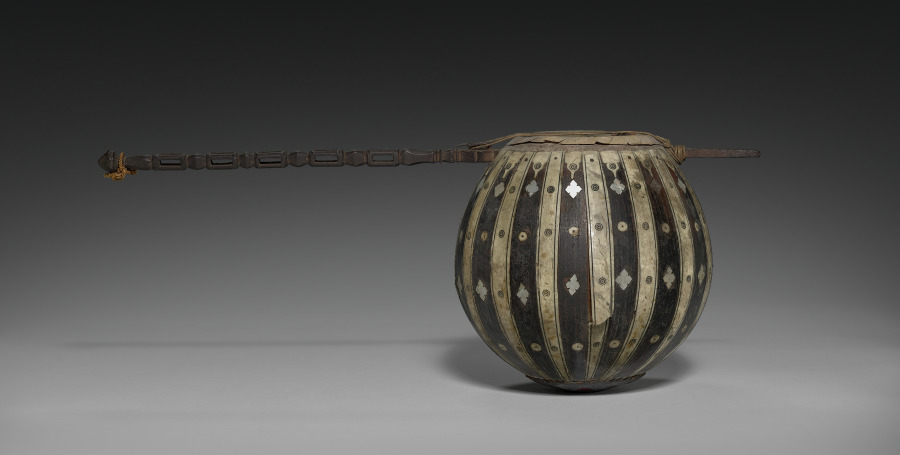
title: Kamānche (incomplete)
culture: Northern Iran (Caucasian, maybe Azerbaijan, or Kashmir)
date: 1875–1900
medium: Wood, hide, and bone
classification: Musical Instrument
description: Kamānche is a Persian term first used in the 10th century to describe an instrument that is sounded with a bow. From there, bowed instruments spread to Byzantium, Central Asia, the Far East, and then to Europe. In Egypt, it is known as the rabāb, a term known throughout the Islamic world from North Africa to Southeast Asia. The names of musical instruments often reveal origin, context, or musical function. In Europe, North Africa, and Asia where contact with Middle Eastern culture occurred, variations of Arabic and Persian terms for instruments are widespread. Usually, related names refer to similar instruments; however, this is not always true. Among these "floating terms" are the names zūrna, rabāb, kāmanja, nāy, and dombak.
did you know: The instrument's spike would be placed on the ground or today, on the knee, when it was played.